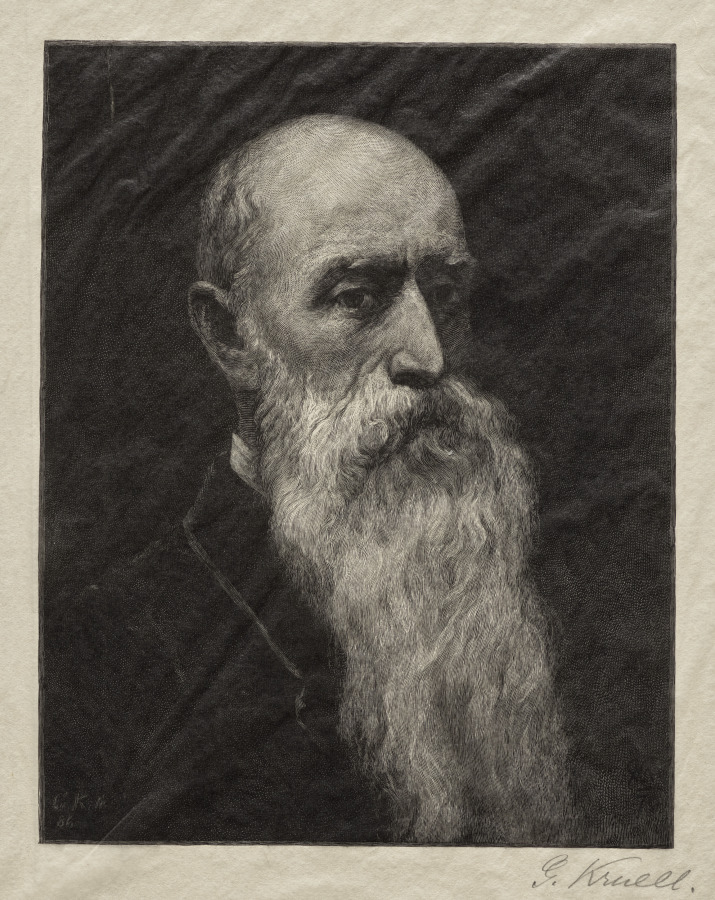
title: William Morris Hunt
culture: America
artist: Gustav Kruell (American, 1843–1907)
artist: after William Morris Hunt (American, 1824–1879)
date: 1886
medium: wood engraving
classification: Print